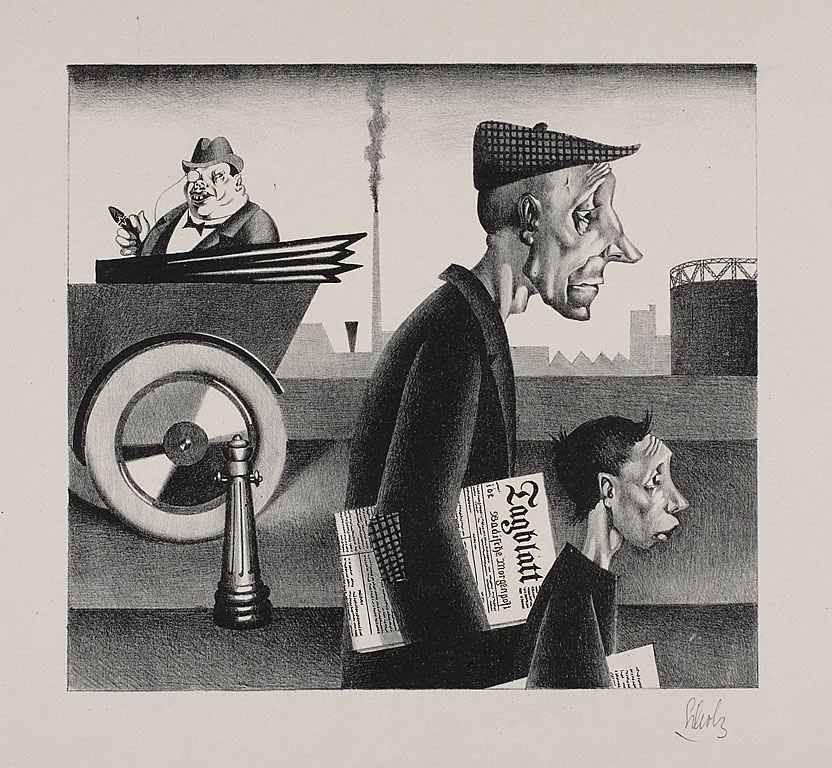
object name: Print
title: Newspaper Carriers (Work Disgraces)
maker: Georg Scholz (German, 1890-1945)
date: 1921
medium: Lithograph on grayish-ivory wove paper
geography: Germany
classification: lithograph; print; prints and drawing